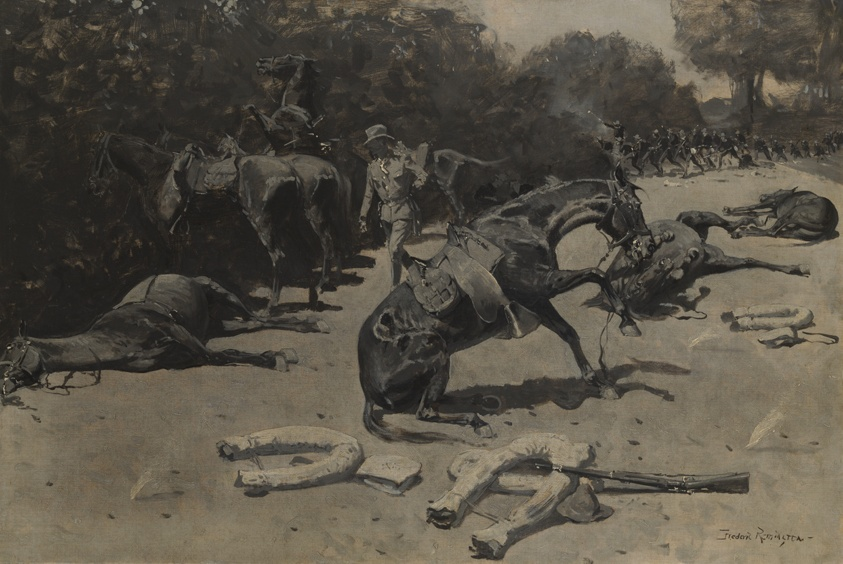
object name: Painting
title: How the Horses Died for Their Country at Santiago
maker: Frederic Remington (American, 1861–1909)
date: 1899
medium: Oil on canvas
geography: United States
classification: painting; american arts